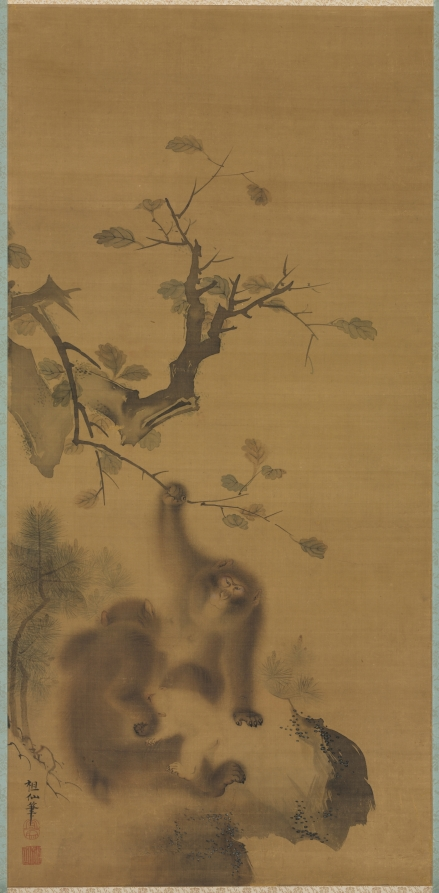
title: Monkeys on a Rock Ledge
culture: Japan, Edo period (1615–1868)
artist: Mori Sosen (Japanese, 1747–1821)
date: c. 1800–1821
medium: hanging scroll, mounted and framed, ink and color on silk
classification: Painting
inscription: signature on left